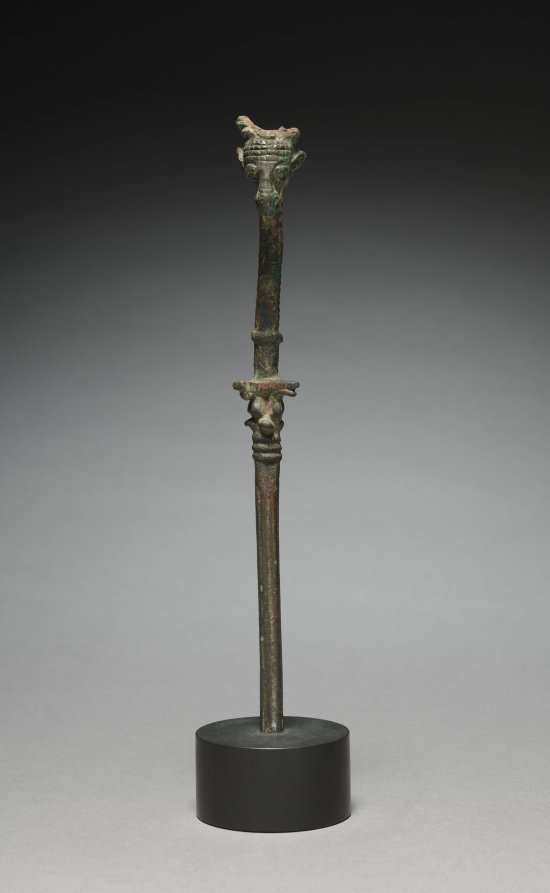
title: Votive Pin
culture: Iran, Luristan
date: early 1000s BCE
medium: bronze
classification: Metalwork